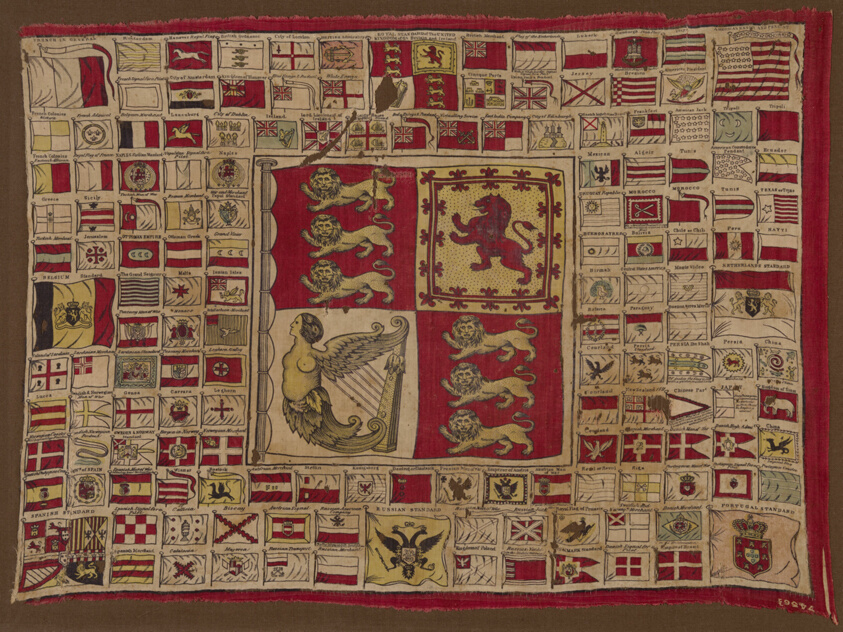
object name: Textile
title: Panel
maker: Possibly England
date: 1840s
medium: Cotton, plain weave; engraved roller printed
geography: England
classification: textile; weaving - printed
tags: propaganda, coat of arms, royalty